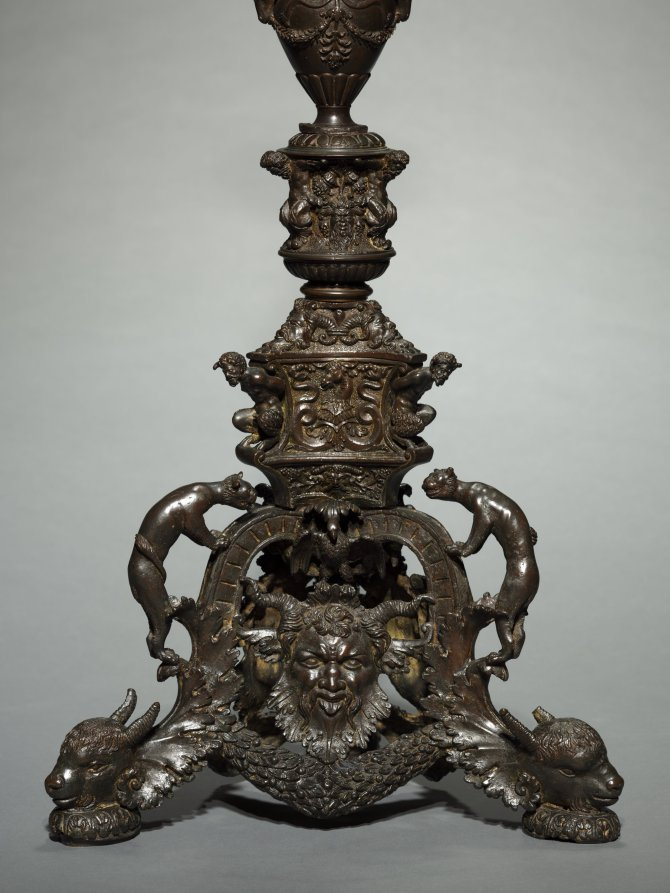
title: Paschal Candlestick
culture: Northern Italy, possibly Padua, 16th century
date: c. 1525–1550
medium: bronze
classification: Sculpture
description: In Roman Catholic practice, a large candlestick holds the Paschal Candle, blessed and lit for the first time on Easter eve, then used on significant occasions throughout the year. Despite its religious function, the decorations here are entirely secular-ranging from panthers and bound satyrs to the heads of raptors and goats. These elements derive from ancient Roman sculpture and were especially popular among intellectuals in northern Italy, who were actively exploring connections among pagan traditions, ancient philosophy, and Christianity.